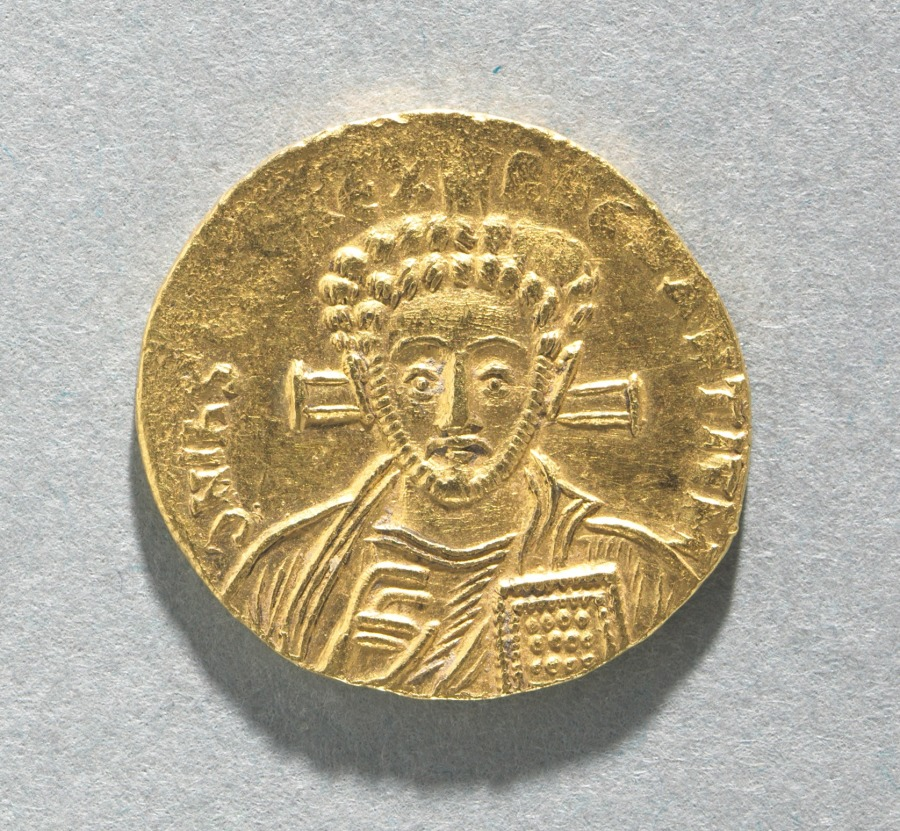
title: Solidus of Justinian II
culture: Byzantium, Constantinople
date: 705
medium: gold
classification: Coins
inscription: Obverse: Bust of Christ, facing, with mustache, close beard, and curly hair; wearing pallium over colobium, his right hand is raised in benediction; his left holds the book of gospels. Behind his head is a cross. Inscription: dN IhS ChS REX REGNANTIUM Reverse: Bust of Justinian II, with mustache and close beard, wearing loros and crown with cross on circlet. In right hand he holds a cross potent on base with three steps, in his left hand he holds a patriarchal cross on globe inscribed with the letters PAX Inscription: DN IUSTINIANUS MULTUS AN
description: Byzantine Gold Coins The vast number of surviving Byzantine coins attests to the level of trade across the empire. Controlled and supervised by the emperor, the producers of coins took care to represent his authority and reflect his stature. Talented artists were recruited to engrave the dies (molds) used for the striking of coins. Emperors increasingly came to include their heirs and co-emperors on their coinage, as well as other family members or even earlier rulers. Coins were recognized, then as now, as small, portable works of art. With their inscriptions and images, Byzantine coins provide valuable documentation of historical events and a record of the physical appearance of the emperors. The coins shown here include the solidus, the basic gold coin of 24 karats; the tremissis, a gold coin of one-third the weight and value of the solidus; and the nomisma, which in the 10th century replaced the solidus as the standard gold coin.